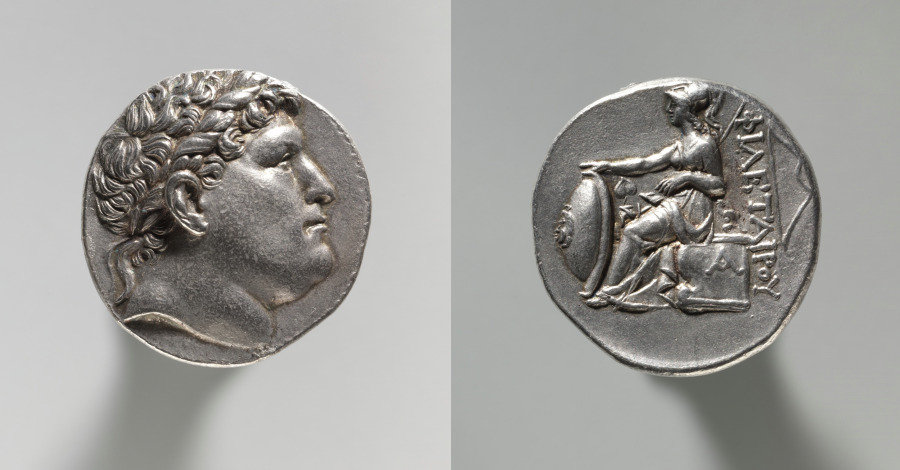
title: Tetradrachm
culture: Anatolia, Kingdom of Pergamum (281–133 BCE), Eumenes I (263–241 BCE)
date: 262–241 BCE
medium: silver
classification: Coins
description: The depictions of rulers found on this coin represents a realistic type of portraiture, similar to that found on coins in the West.